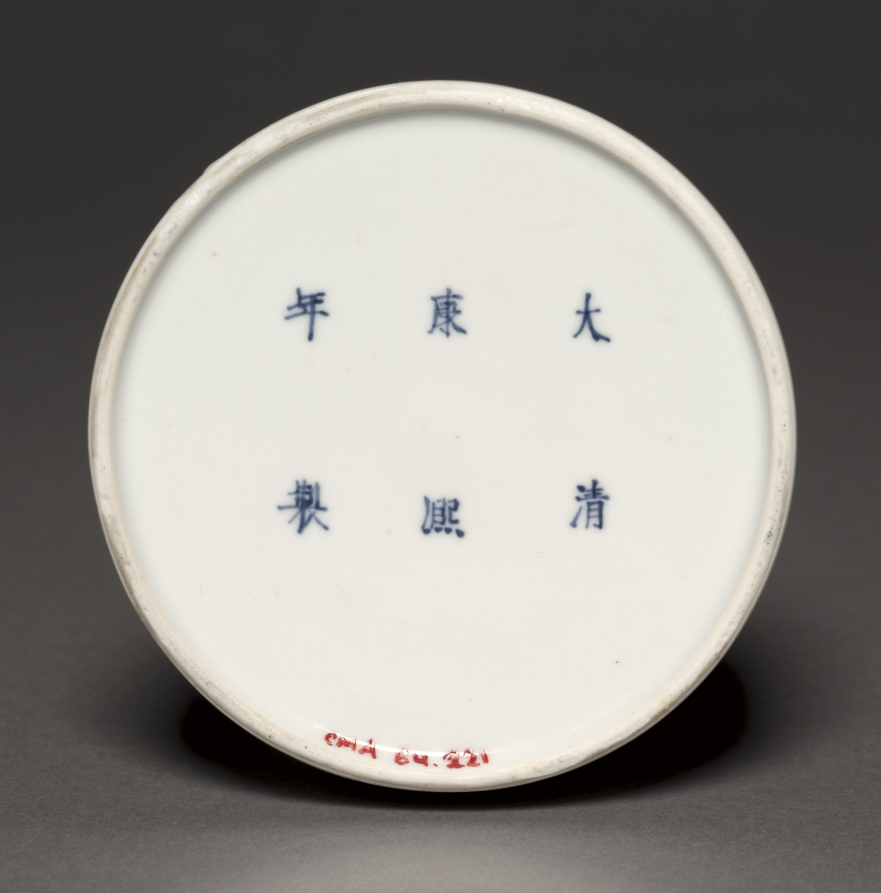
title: Mallet-Shaped Bottle with Phoenixes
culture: China, Jiangxi province, Jingdezhen, Qing dynasty (1644-1911), Kangxi mark and period (1662-1722)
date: 1662–1722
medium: porcelain with underglaze red (and green) decoration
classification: Ceramic